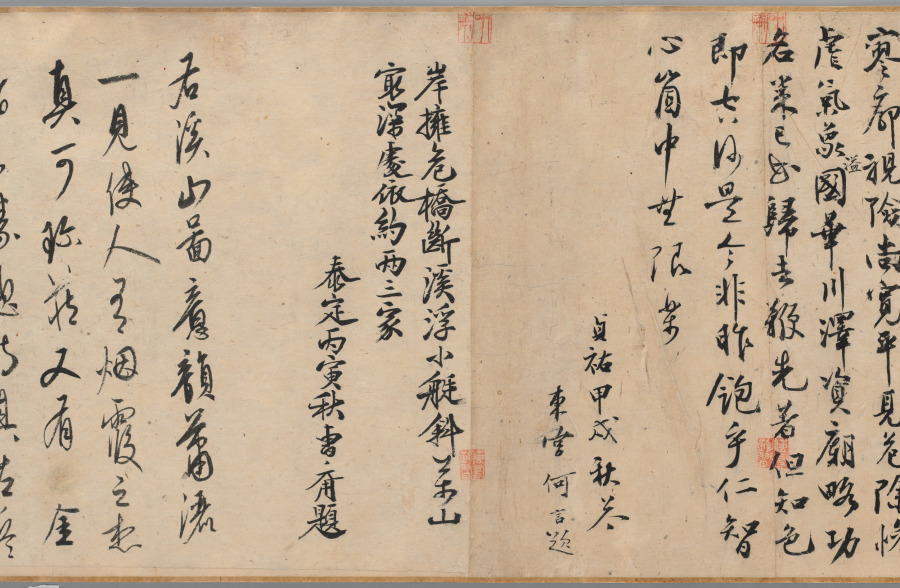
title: Streams and Mountains without End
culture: China, late Northern Song dynasty (960-1127) - Jin dynasty (1115-1234)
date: 1100–1150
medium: handscroll; ink and slight color on silk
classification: Painting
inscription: 9 colophons and 48 seals: 1 colophon, dated 1205, of Wang Wenwei 王文蔚 (dates unknown); 1 colophon, dated 1205, of Li Hui 李惠 (dates unknown); 1 colophon of Weiluo Tian Xie 蔚羅田獬 (dates unknown); 1 colophon, dated 1214, of He Yan 何言 (dates unknown); 1 colophon, dated 1326, of Cao Yuanyong 曹元用 (d. 1329) 1 colophon, dated 1332, of Kangli Zishan 康里子山 (Naonao; 1295-1345); 1 colophon, dated 1336, of Liu Zai 劉載. (dates unknown); 1 colophon, dated 1380, and 4 seals of Yang Mao 楊懋 (1300-after 1380); 4 seals of the Hou family (ca. 1340); 1 colophon of Wang Duo 王鐸 (1592-1652); 4 seals of Zhang Bingqian 張秉乾 (juren of 1729); 8 seals of Liang Qingbiao 梁清標 (1620-1691); 2 seals of the Qianlong emperor (r. 1736-95); 4 seals of the Jiaqing emperor (r. 1796-1820); 3 seals of the Xuantong emperor (r. 1909-11); 2 seals of Ye Gongchuo 葉恭綽 (1881-1968); 17 seals of Zhang Yuan 張爰 (Zhang Daqian 張大千, 1899-1983).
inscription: Colophon 1. Wang Wenwei 王文蔚. Dated third month and third day, 1205, under the reign of Zhangzong of the Jin dynasty. 造物元無心，山川秀氣聚。畫手亦無盡，各出新意度。 誰將妙林泉，淡墨寫縑素。重巒疊嶂間，三兩人家住。 茅舍隔素籬，小橋通細路。溪上數葉舟，雅有物外趣。 嵓崦藏招提，依稀認窗戶。山色四時宜，雲煙自朝暮。 不知塵世中，此景在何處。收拾買山錢，投老好歸去。 泰和乙丑三月三日平原王文蔚謹再拜，書于河東縣署之野趣堂。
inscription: Colophon 2. Li Hui 李惠. The colophon was written three days before the Qingming Festival in 1205. 畫師慣在山中居，含毫吮墨聊自娛。 閑將一段冰霜絹，寫出千里江山圖。 前山後山互出沒，山腰林樾相縈紆。 危橋澗溜瀉鳴玉，山根一匯為平湖。 波平短艇快漁釣，雲深細徑來樵蘇。 僊宮梵宇占幽勝，雕欄複閣森蓬壺。 往來行客煙靄外，飄飄野店青帘孤。 人家雞犬聲相接，熙熙化日安唐宇。 嗟余嗜好何其迂，膏肓泉石真吾徒。 一行作吏墮世網，薄書汨沒勞奔趨。 千巖萬壑但夢想，故園三徑應將蕪。 披圖暫洗黃塵眼，拊膺三嘆空踟躕。 泰和乙丑清明前三日絳臺李惠書于舜城府署之九思堂。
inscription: Colophon 3. Weiluo Tian Xie 蔚羅田獬. 畫工紛紛不可紀，擺脫俗流幾人耳。 夫誰援筆掃鵝溪，一段風煙且千里。 白波青嶂渺無窮，水接山兮山插水。 小橋野店相勾連，古寺樓臺突兀起。 飄然氣象與神俱，但患未明孰姓氏。 郭熙雖老典型存，為問主公無乃是。 此畫世希當寶藏，無與碌碌同一視。 更看卷首數公詩，奇絕清新相表裏。 蔚羅田獬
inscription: Colophon 4. He Yan 何言. Written in 1214. 萬有來自無，一真歸所託。畫師得三昧，胸中幻丘壑。 百態逐墨破，群形隨筆落。地近迹分明，天遙痕隱約。 雲物自吐吞，峯巒非斧鑿。江鄉閴無市，谷關常不鑰。 中有野夫閑，童琴而歩鶴。酒斾出籬懸，漁舟臨岸泊。 澗樹蔽橋樑，巖松迷殿閣。岑疊宿霧重，野曠林煙薄。 危棧接縈紆，亂泉通脈絡。途中人往來，僕馬何羸弱。 怪石虎踡跼，古木龍蟠錯。一幅宜好收，千金非易博。 玉堂閑卷舒，眼界增寥廓。視險尚寛平，見危除慘虐。 氣象溢國華，川澤資廟略。功名業已書，歸去鞭先著。 但知色即空，何是今非昨。飽乎仁智心，箇中無限樂。 貞祐甲戌秋暮，東營何言題。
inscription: Colophon 5. Cao Yuanyong 曹元用 (d. 1329). Dated 1326. 岸擁危橋斷，溪浮小艇斜。 萬山最深處，依約兩三家。 泰定丙寅秋，曹元用題。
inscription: Colophon 6. Kangli Zishan 康里子山 (i.e., Kangli Naonao). The colophon bears a date of 1332. 右溪山圖，意韻蕭灑。一見使人有烟霞之想，真可珍藏。又有□金諸名勝題詩其左。兵火之餘， 殊不易得也。 至順三年暮春之月，康里子山跋。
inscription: Colophon 7. Liu Zai 劉載. 雲拂埜田閑種玉，雨餘巖溜碎傾金。 幾時也結團茆去，麟閤恬然不挂心。 至元二年正月，長安劉載載之謹錄上。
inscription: Colophon 8. Yang Mao 楊懋 (1300–after 1380). 觀此圖，經營位置，筆法高古，山明石潤。其橋梁、路道、樹林、人物、遠近；一一誠得真山水之深趣。非當時名筆有大才者不能至此。不必問其誰何，可為神品。况宋金元三朝名公所跋，尚不能記，想其來尤遠矣。然而物經累變而尚存，是物之有壽者也。余不復再論。文顯其保之。洪武庚申春，八十翁楊懋觀。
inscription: Colophon 9. Wang Duo 王鐸 (1592–1652). 文蓀親翁博雅，文詩鴻暢。舍弟持此喜觀，遂抽管題數語： 山勢委折，筆墨無痕。宋人中如此不多見也。譬之兵家，當是韓白。王鐸。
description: Streams and Mountains without End was a landmark acquisition of 1953, made just a year after Sherman Lee had returned to Cleveland as curator of Oriental art. He acquired it with the intention to provide "a more than adequate foundation for a fine collection of Chinese landscape painting." This impressive work demonstrates the culmination of stylistic developments in Chinese monumental landscape painting following the Northern Song tradition. It represents a journey through a landscape, making it a fitting metaphor for Lee’s journey of discovery and achievement over a lifetime.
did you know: The portrayal of the distant lands is rich with details like pavilions, villages, and human activities.